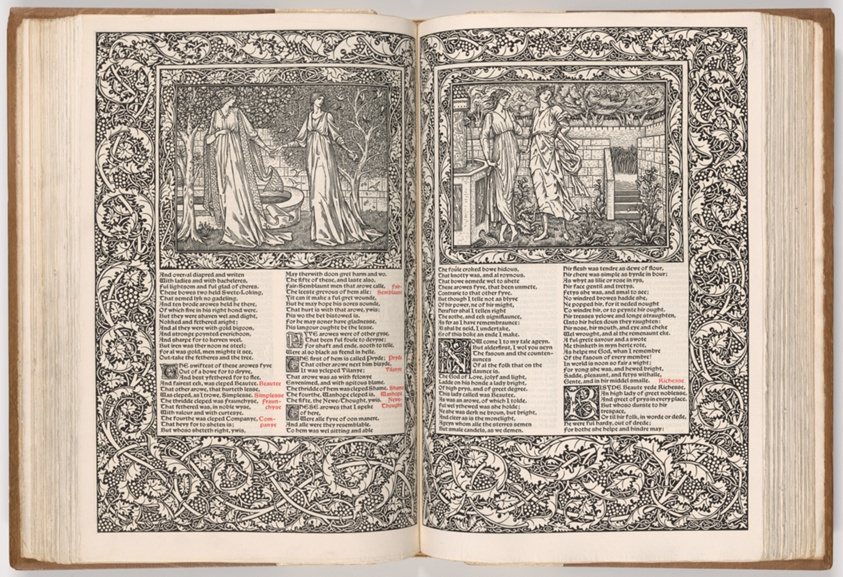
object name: Book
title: The Works of Geoffrey Chaucer Now Newly Imprinted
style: Arts and Crafts Movement, 19th century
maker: William Morris (English, 1834–1896); Illustrated by Sir Edward Burne-Jones (English, 1833-1898); Engraved by William Harcourt Hooper (English, 1834-1912)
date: 1896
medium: Hand-printed book on Batchelor linen paper, bound with tooled white pigskin on oak board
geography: England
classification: book; ink on paper